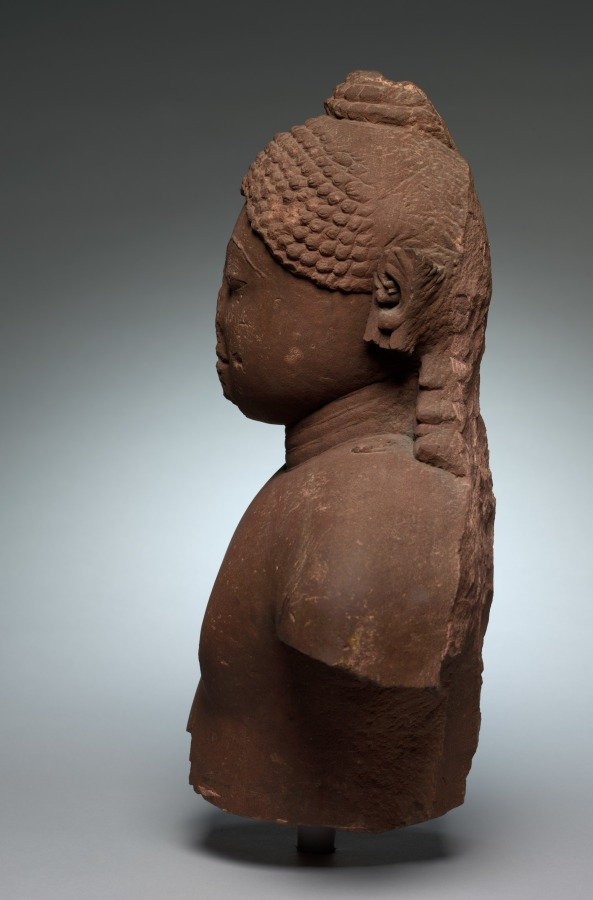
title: Rishabha, the First Jina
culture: Central India, Chandela Dynasty, 9th - 10th Century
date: 800s–900s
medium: stone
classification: Sculpture